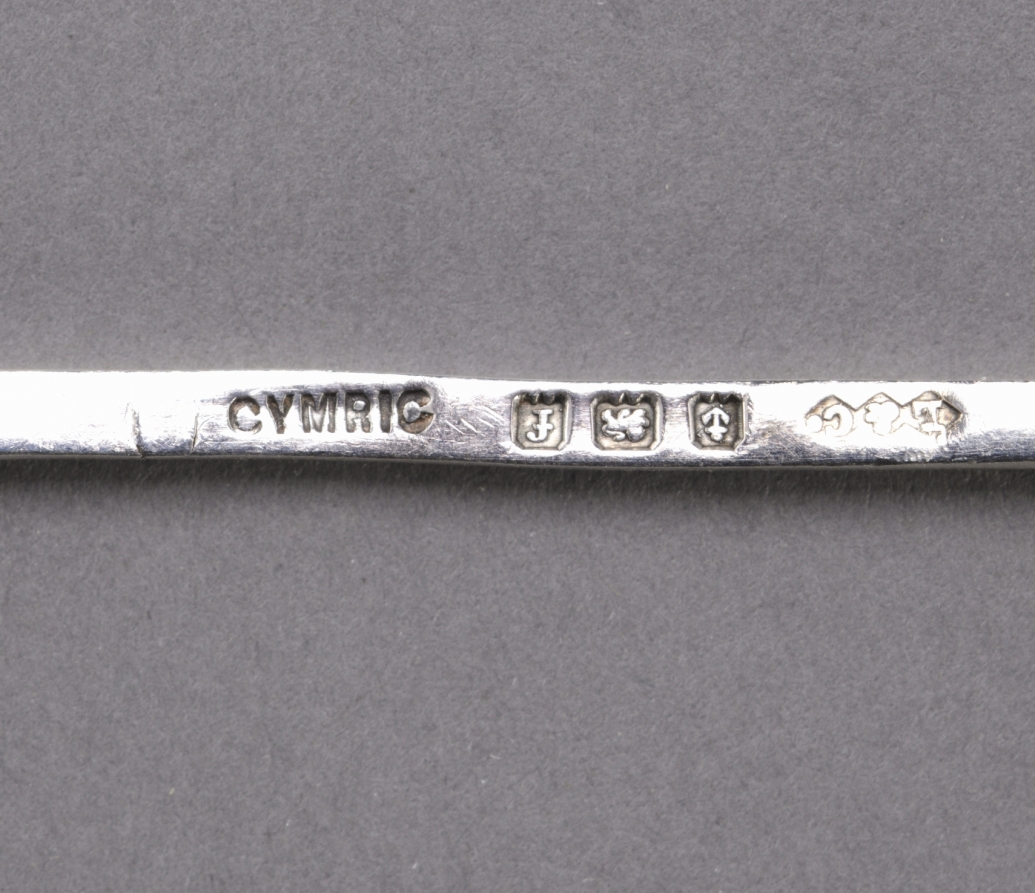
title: Set of six Spoons in Original Box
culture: England, London, 19th century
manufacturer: Liberty and Company (British)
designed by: attributed to Archibald Knox (British, 1864–1933)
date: c. 1895–1910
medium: Silver, enamel decoration and leather box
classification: Silver